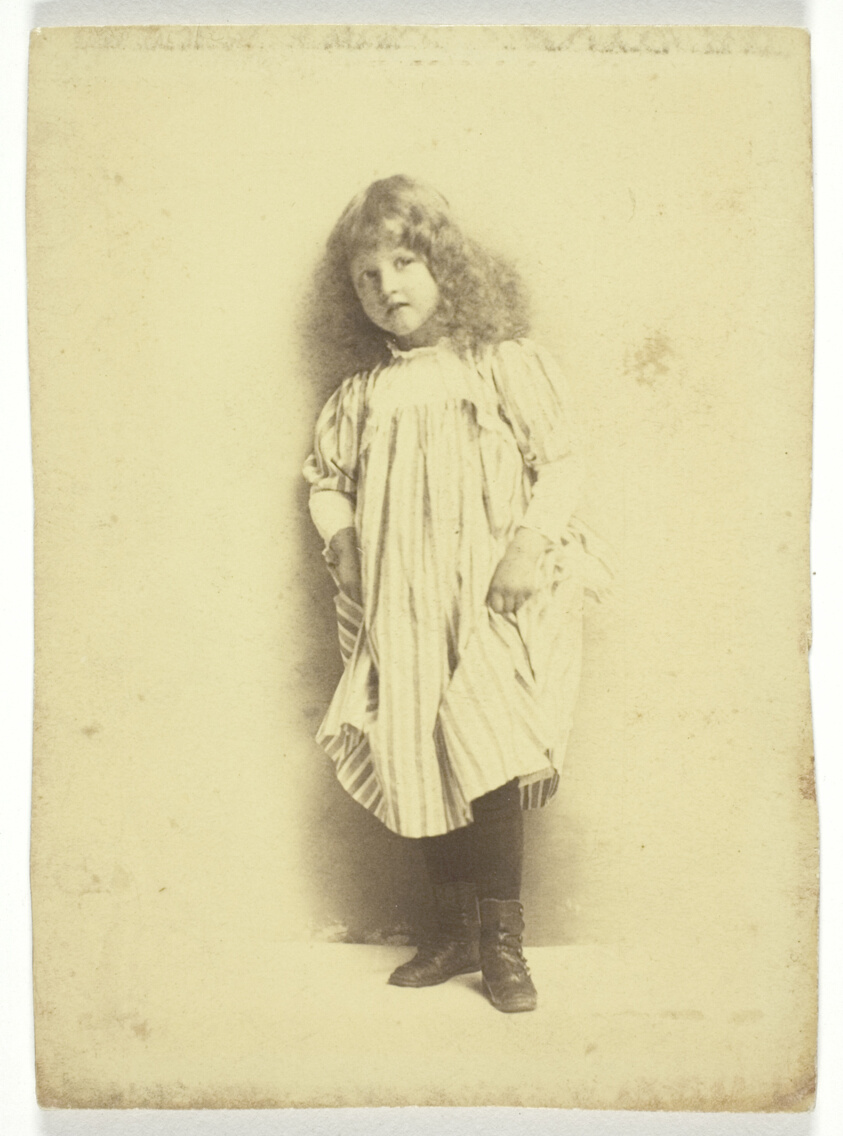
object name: Photograph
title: Portrait of Marian Deering McCormick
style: 19th century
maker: Artist unknown; American, 19th century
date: 1893/94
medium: Albumen print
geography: United States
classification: cabinet card (albumen); albumen silver print; photographic process; photography; photograph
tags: portraits, portraits: child subject, photography